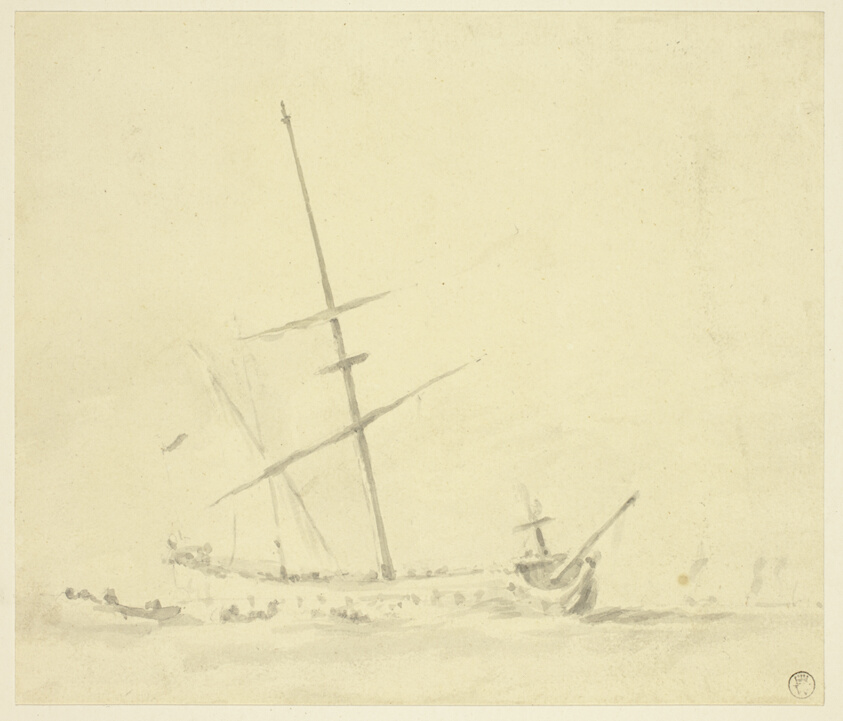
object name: Drawing and Watercolor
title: Row Boats near a Ship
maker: Attributed to Willem van de Velde, II; Dutch, 1633-1707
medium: Brush and gray wash with graphite, on cream laid paper, laid down on board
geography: Holland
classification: ink or chalk wash; drawings (visual works); prints and drawing